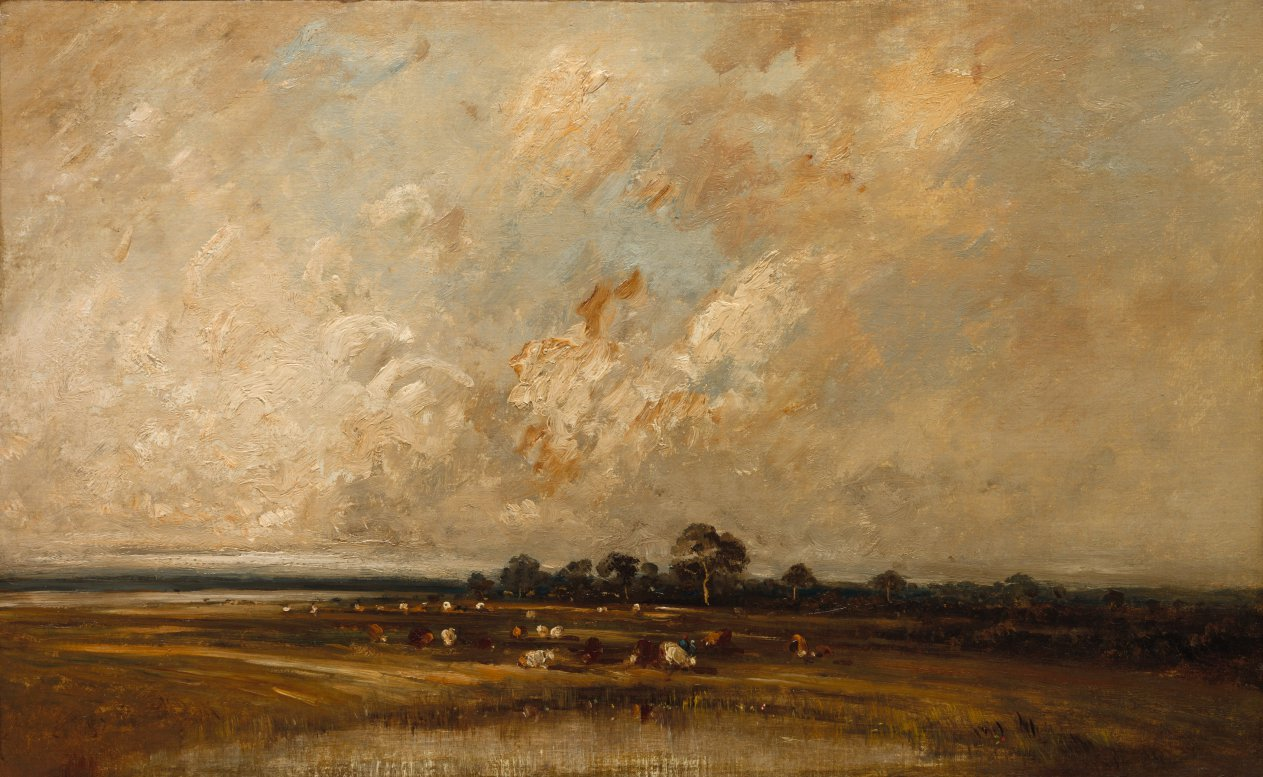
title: Marshland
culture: France, 19th century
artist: Jules Dupré (French, 1811–1889)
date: 1860s-1870s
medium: oil on fabric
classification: Painting